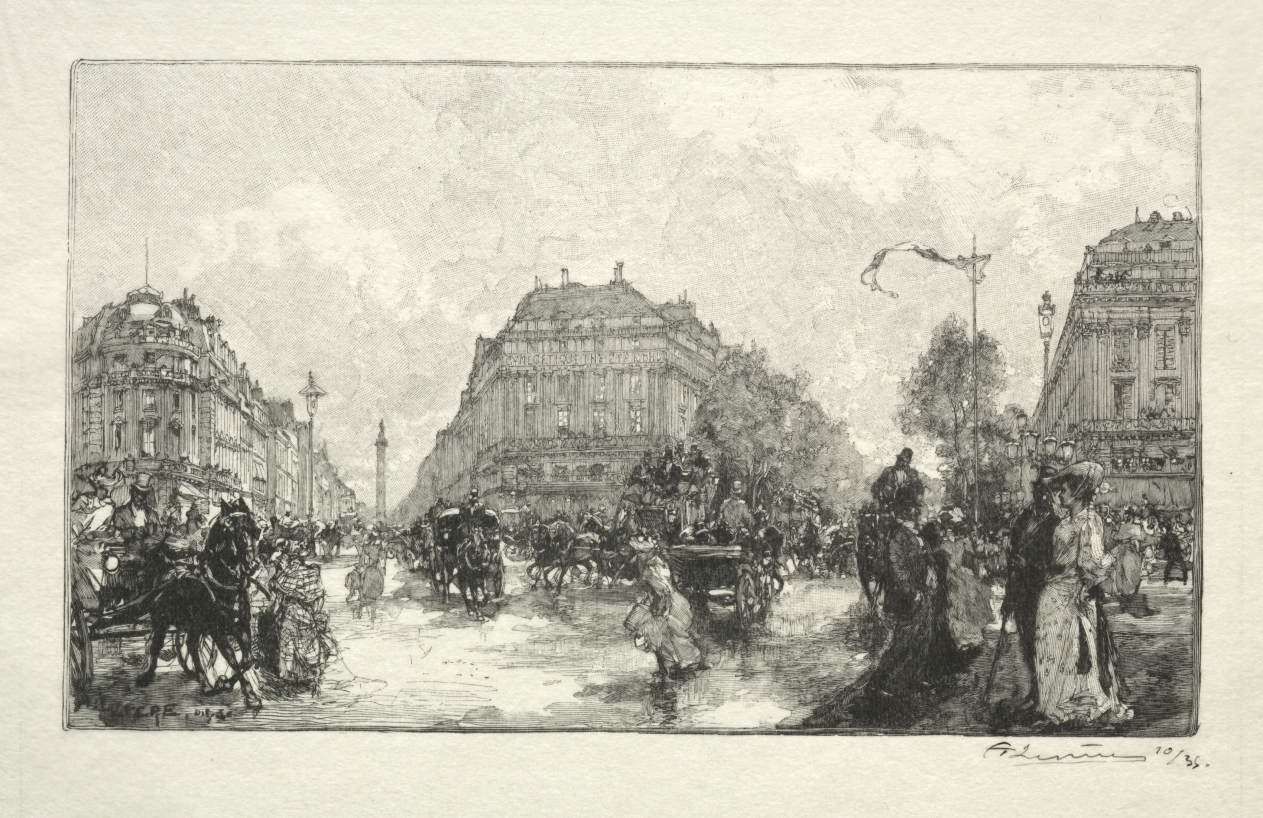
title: Place de l'Opera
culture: France, 19th century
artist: Auguste Louis Lepère (French, 1849–1918)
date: 1890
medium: wood engraving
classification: Print